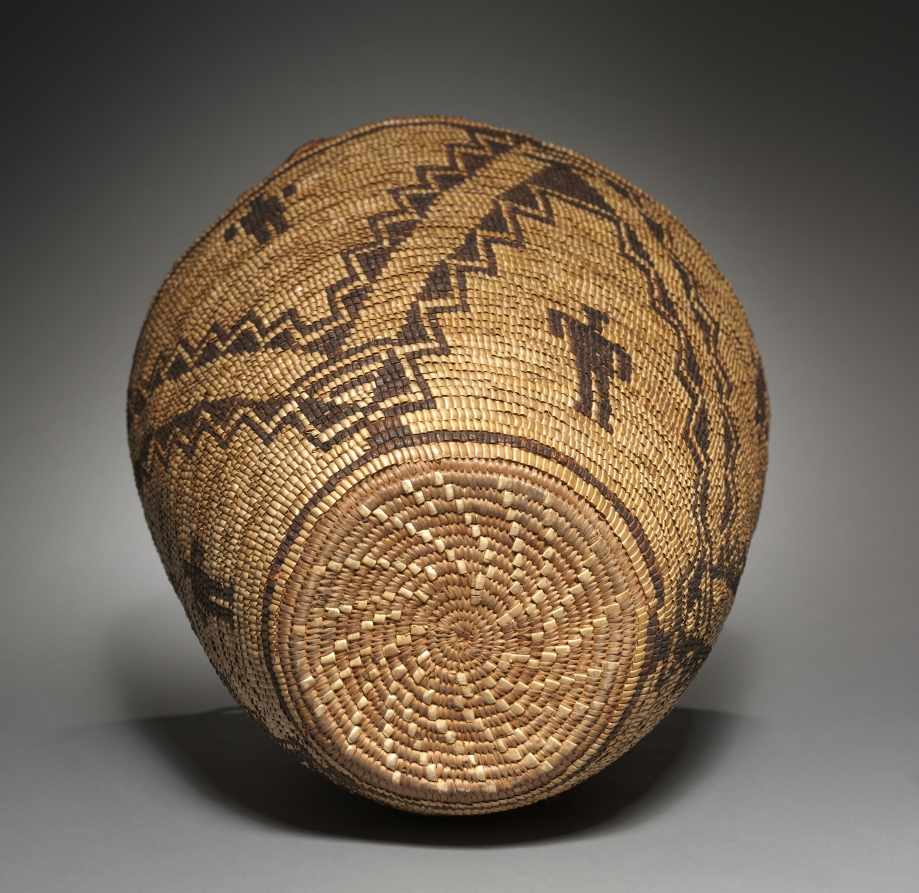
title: Burden Basket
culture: Native North American, Pacific Northwest, Plateau, Klickitat people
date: c.1900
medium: horsetail fragments on cedar rool; coiled, imbricated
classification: Basketry